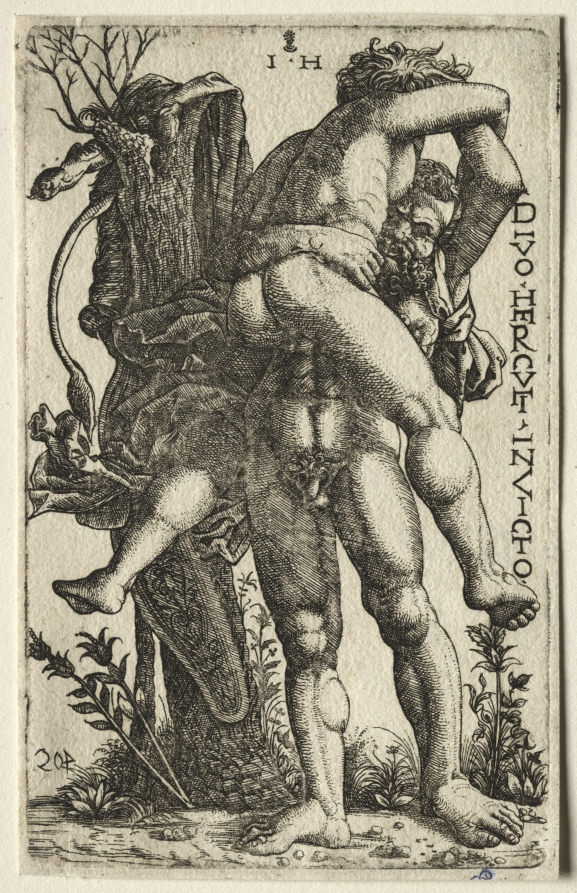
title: Hercules and Antaeus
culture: Germany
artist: Hieronymus Hopfer (German)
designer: after Andrea Mantegna (Italian, about 1431–1506)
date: 1528–63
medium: etching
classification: Print